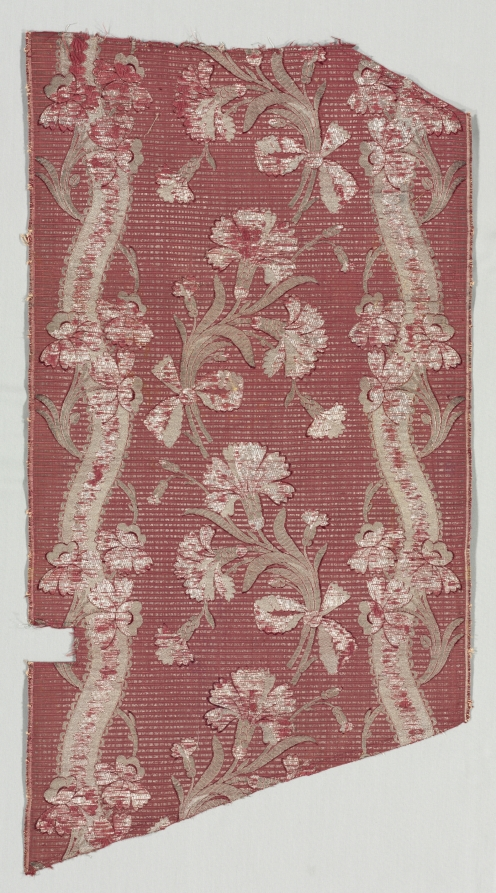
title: Fragment of Silk Brocade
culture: Spain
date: 1700s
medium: plain cloth, brocaded; silk and metal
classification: Textile